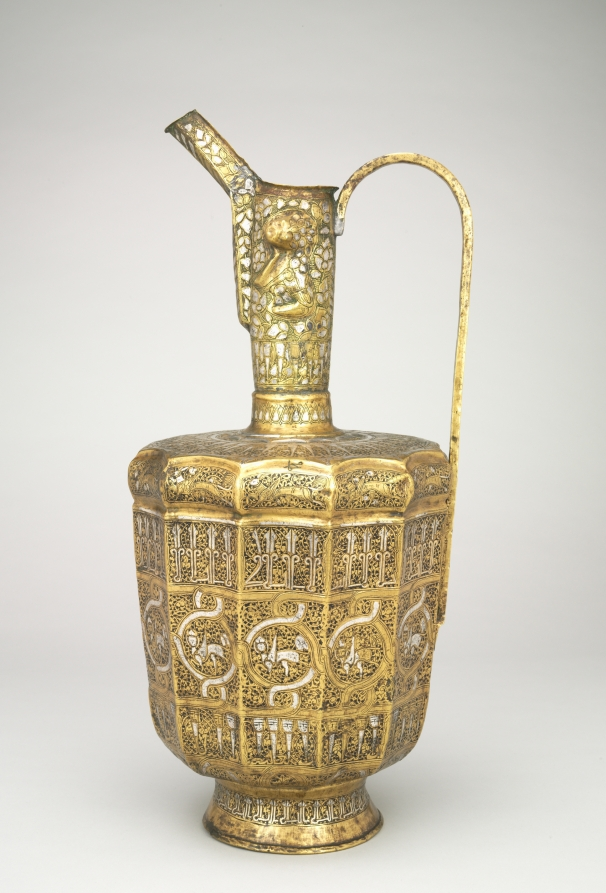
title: Twelve-sided Ewer with Sphinxes and Human-Headed Inscriptions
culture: Iran, Khurasan, Ilkhanid period (1256–1353)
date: 1300–1350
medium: hammered sheet of brass inlaid with silver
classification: Metalwork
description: The spout and neck of the ewer display a crouching and seated lion in raised relief. Winged hare-like animals march around the top of the body, set off by foliate scrolls, while sphinxes process around the center. The bottom of the ewer’s body is encircled by an inscription with human heads, which only appear on metalwork in Islamic art. Ewers like this, and similar elaborate vessels, would have been used in court banquets and elite homes across the Islamic world.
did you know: Calligraphy with human heads, known as animated script, developed in northeast Iran during the 1100s.